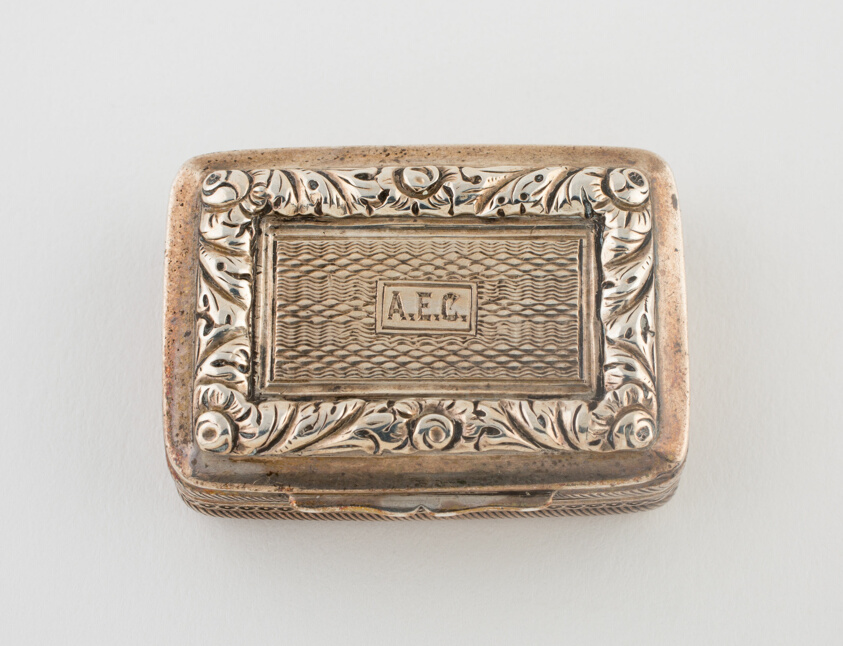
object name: Metalwork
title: Vinaigrette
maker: Marked TN; Birmingham, England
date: c. 1822/23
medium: Silver and silver gilt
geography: Birmingham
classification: container for personal use; vinaigrette (container for health care); european decorative arts; metalwork; silver; decorative object/ornament